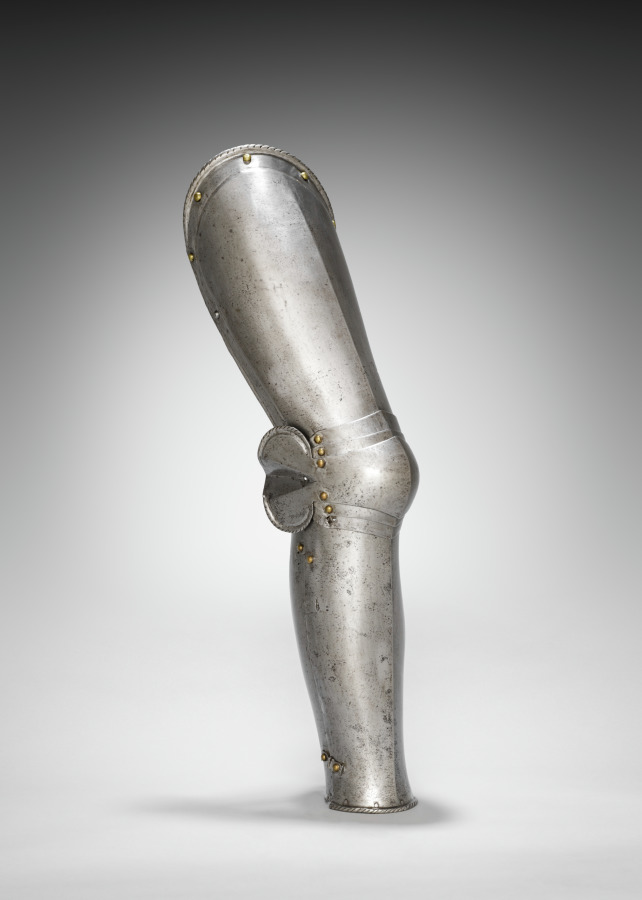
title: Proper Right Cuisse and Knee Cop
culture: South Germany, 16th century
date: c. 1560–1580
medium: steel, leather straps, brass rivets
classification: Arms and Armor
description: This armor was developed for the joust-a sporting combat between two mounted contestants. Although all of the elements of this armor date from the same period, they are not all from the same suit. This armor is thus called "composed." It also shows the asymmetry of jousting armor. The participants rode along a wall-like barrier known as a "tilt" with their left sides facing one another. Consequently, armor on that side of the body had to be thicker. Note the large plate (grandguard) over the left shoulder for extra protection. Also, the breathing holes in the helmet were placed on the right side (farthest from an opponent's lance) to avoid injuries from splinters. The bracket attached to the right breastplate is called the lance-rest, a shock-absorbing support designed to accommodate the lance when "couched" under the right armpit.